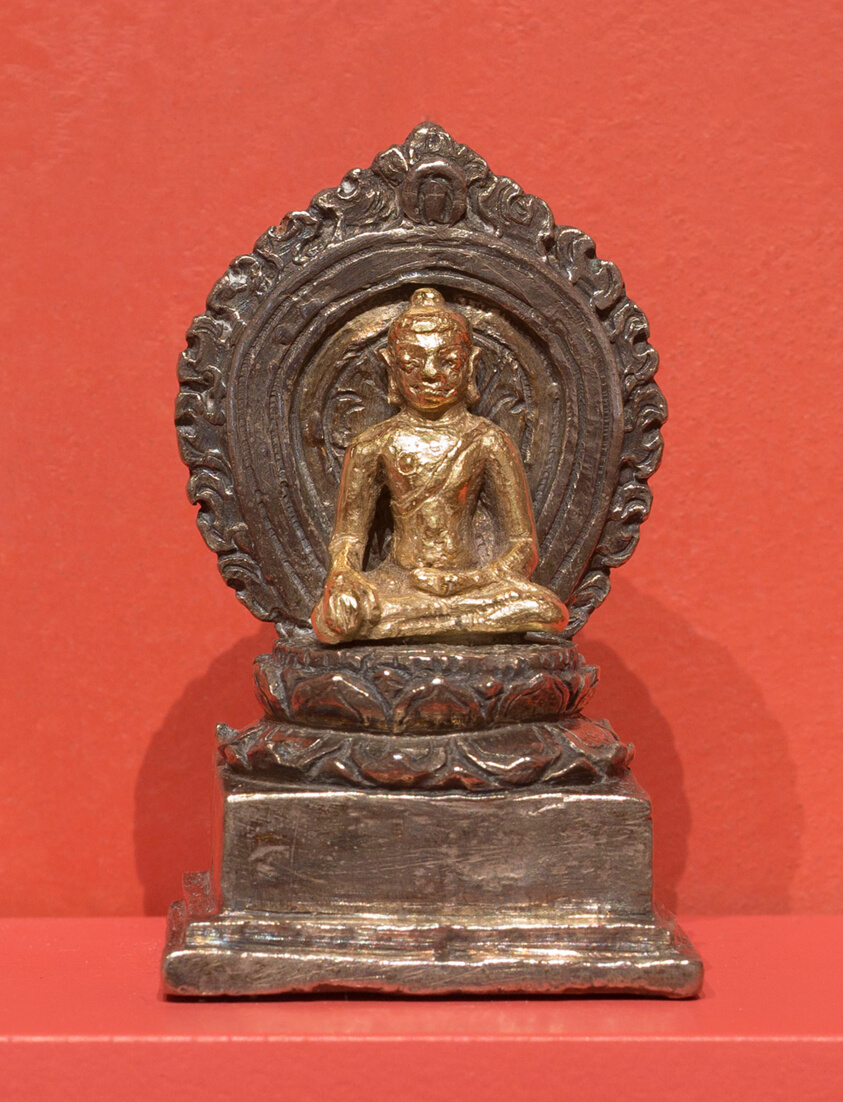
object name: Sculpture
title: Transcendent Buddha Akshobhya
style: Southeast Asian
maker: Indonesia; Central Java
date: 9th/10th century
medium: Gold and silver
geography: Central Java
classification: sculpture